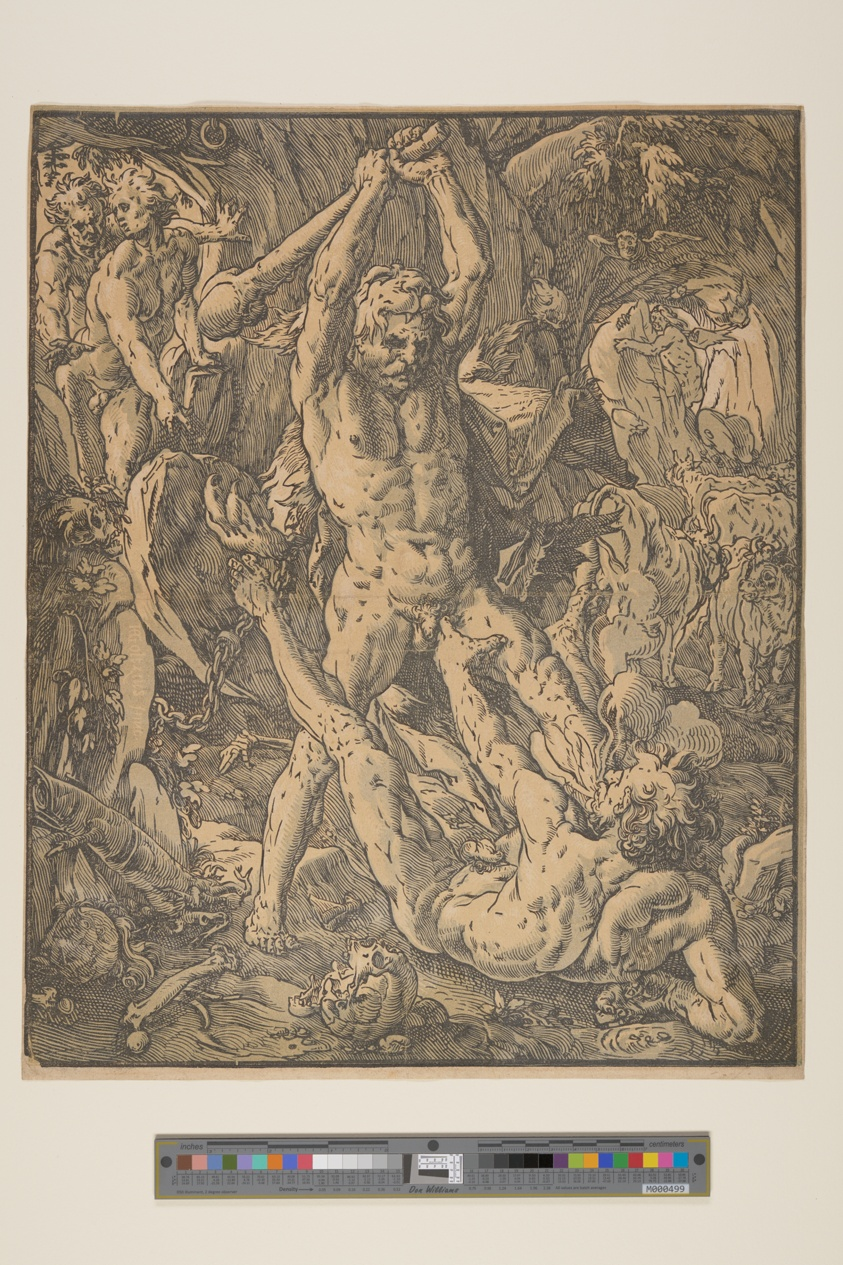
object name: Print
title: Hercules and Cacus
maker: Hendrick Goltzius (Dutch, 1558–1617)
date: 1588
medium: Chiaroscuro woodcut from three blocks in yellow and gray-green on paper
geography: Netherlands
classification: print; paper; prints and drawing; woodcut